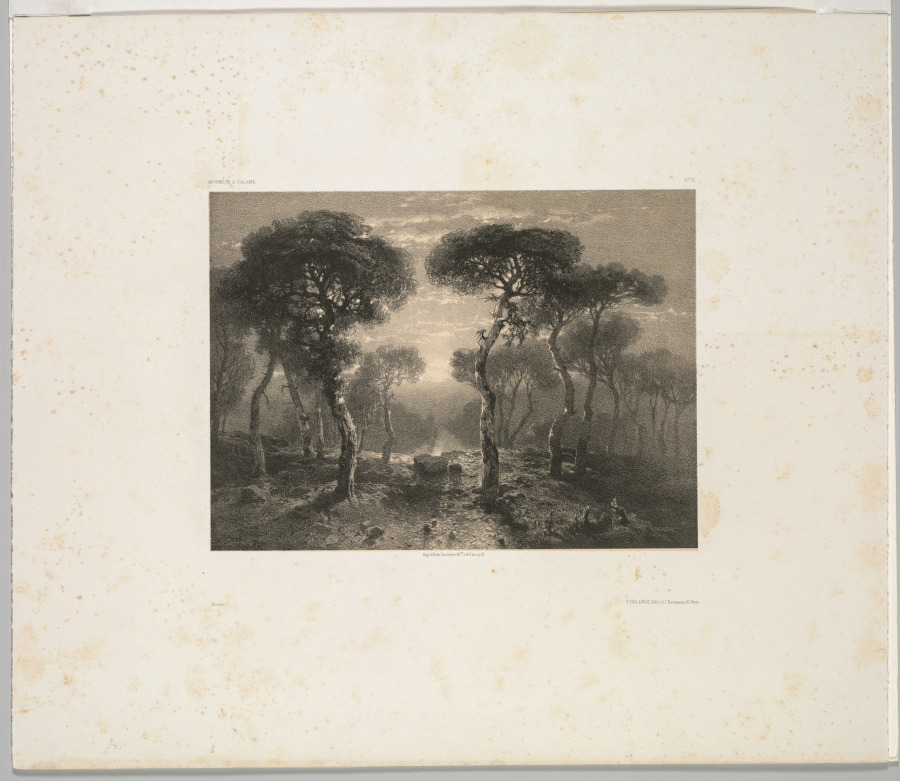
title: Oeuvres de A. Calame, No. 13: Forêt de Sierre en Valais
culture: France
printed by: Jacomme & Cie. R. de Lancry, 12, Paris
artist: Alexandre Calame (Swiss, 1810–1864)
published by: F. Delarue, r. J.J. Rouseau, 10, Paris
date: 1843 (published 1851)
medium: lithograph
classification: Print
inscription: On plate; upper left corner: Oeuvres de A. Calame.; upper right: No. 13; below image center: Imp.lith.de Jacomme & Cie. R. de Lancry, 12.; below image left: Dessin, below image right: F. Delarue. Edit.r.JJ.Rousseau. 10.Paris